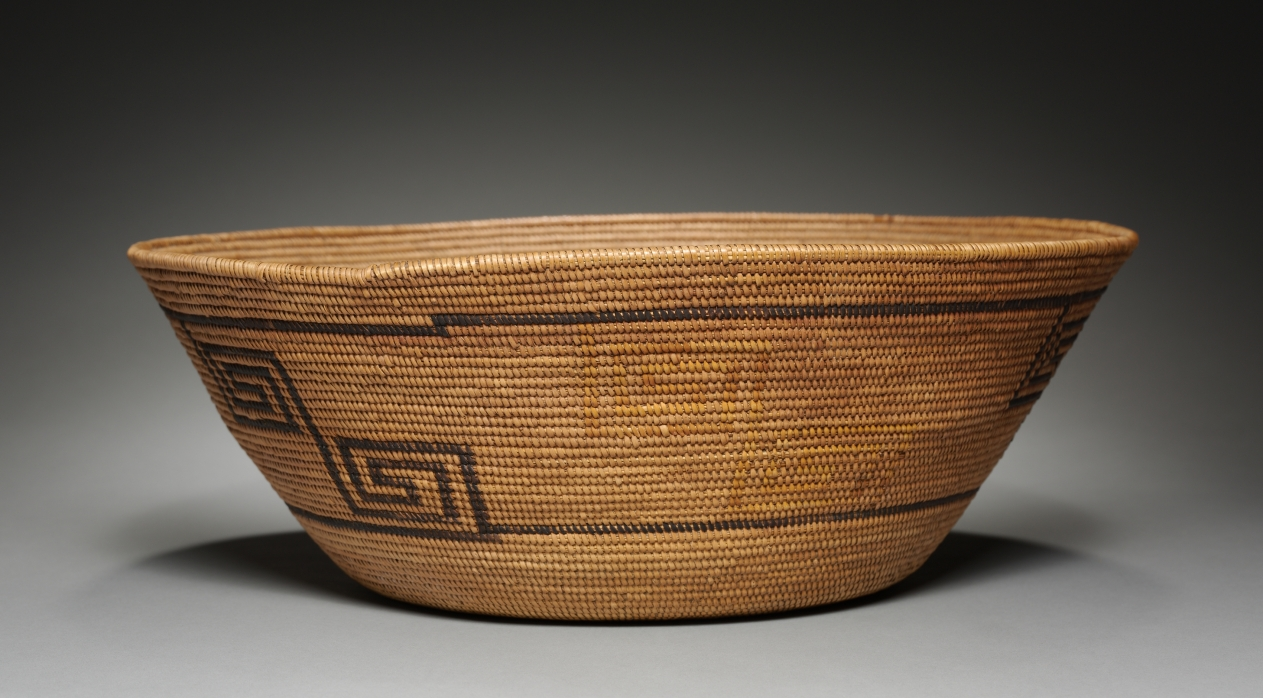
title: Food Bowl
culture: California, Mission, Late 19th- Early 20th century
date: c 1875– 1924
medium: coiled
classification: Basketry